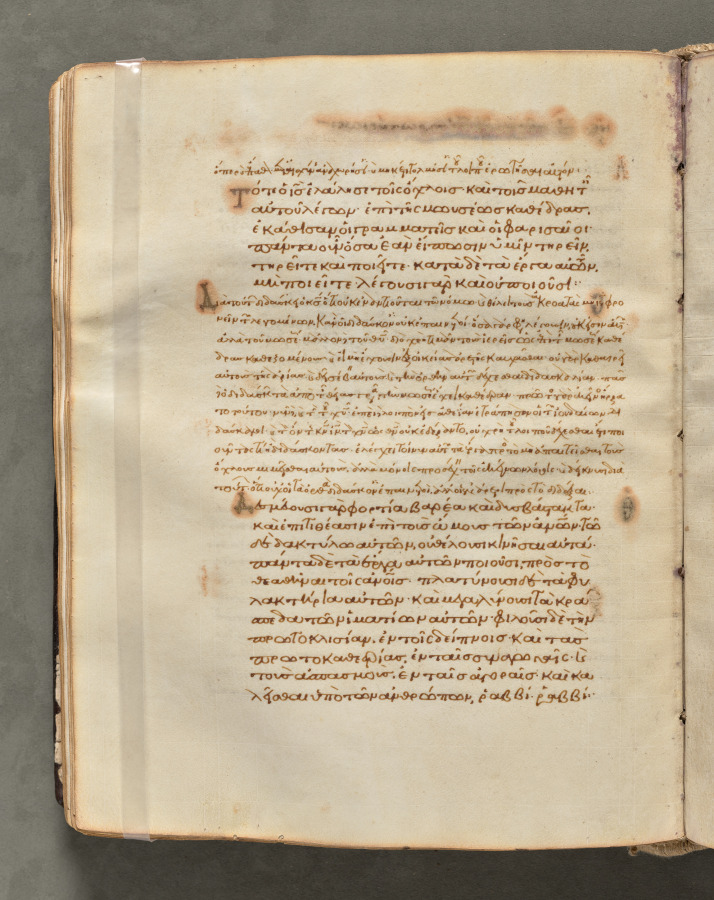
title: Text, folio 100 (verso), from a Gospel Book with Commentaries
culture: Byzantium, Constantinople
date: c. 1000–1100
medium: ink, tempera, and gold on vellum; leather binding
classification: Bound Volume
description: Each of the four gospels in this book opens on a page with brilliantly illuminated borders depicting the author of the text as well as birds-principally peacocks, symbols of the immortality of the soul-and fountains, representing the fountain of life and the salvation of the soul. This volume consists of 428 leaves with texts in Greek. Its level of sophistication suggests that it was probably written and decorated in a monastery in Constantinople.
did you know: Gospel Books were carried in procession through Byzantine churches.